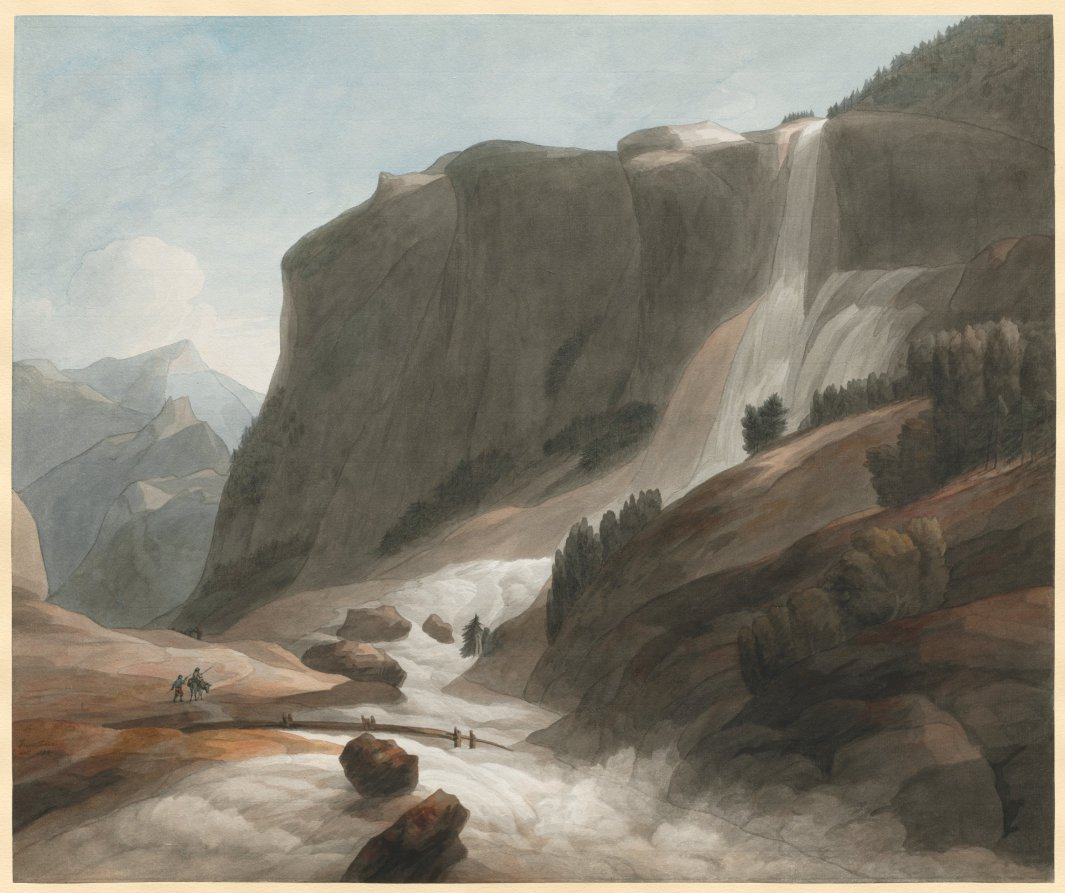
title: Waterfall between Chiavenna and Mount Splügen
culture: England, 18th century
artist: Francis Towne (British, 1739/40–1816)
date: 1784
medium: watercolor with graphite, point of brushwork, and selective glazing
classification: Drawing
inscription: signed and dated, in pen and brown ink, at lower left: Francis Towne / dell. 1784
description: Francis Towne spent a year painting the architectural wonders of Rome and its environs on what was to be his only trip to the Continent. On the journey back to England, he traveled over the Alps, visiting the Italian Lakes, crossing over the Splügen Pass into Switzerland, finally arriving in Geneva. His distinctive style, characterized by an austere simplicity of vision, found its fullest expression in his Alpine views, described by one scholar as "unquestionably among the greatest by any 18th-century artist of mountain scenery." Against the earth tones of the brooding cliffs, the crash of the waterfall is like a white explosion.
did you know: This drawing once belonged to Paul Oppé, one of Britain's most esteemed art historians and a legendary authority on English drawings.